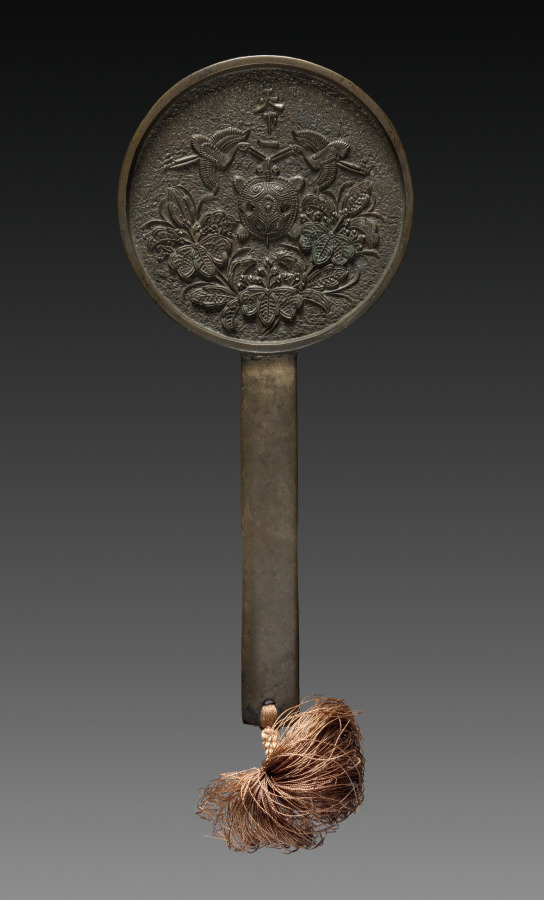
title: Mirror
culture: Japan, Edo period (1615–1868)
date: 1615–1868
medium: bronze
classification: Metalwork